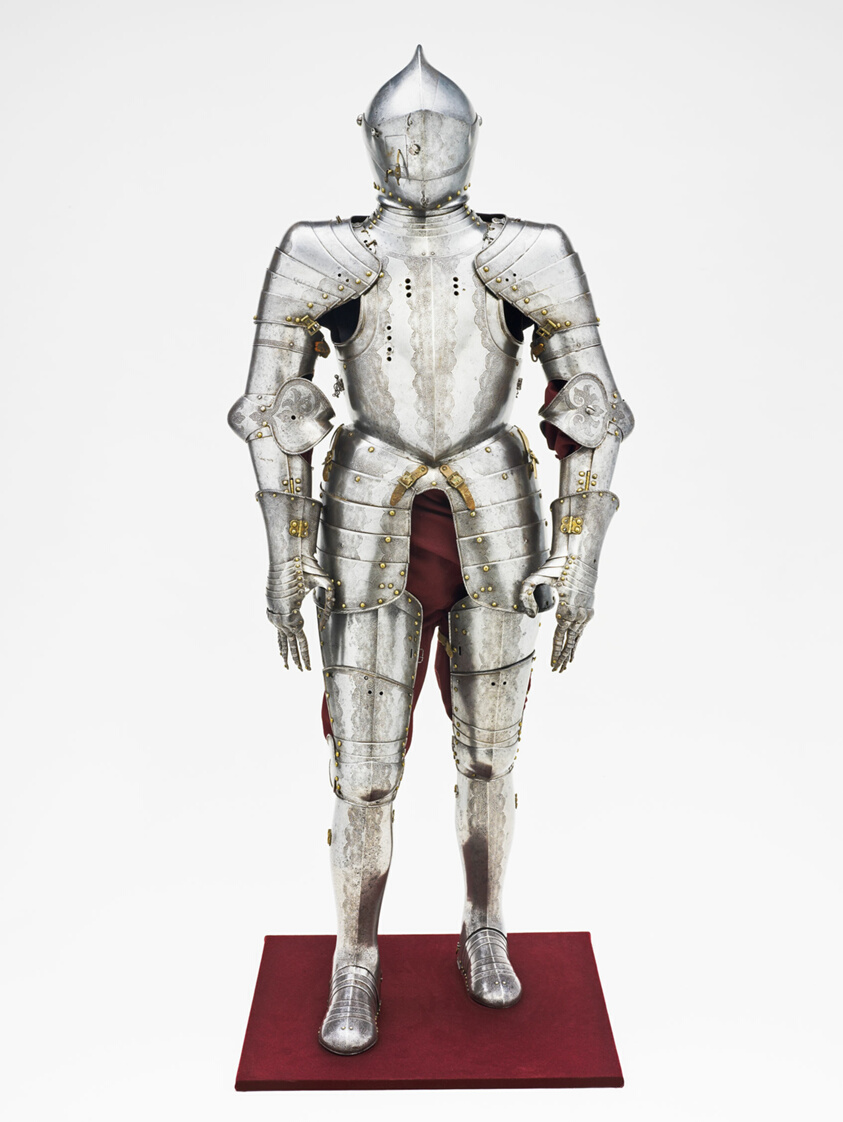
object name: Armor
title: Armor for Field and Tournament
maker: Jörg T. Sorg, the Younger, after; German, Augsburg, active 1502-1542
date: c. 1540/60 with later etching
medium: Steel with gilding, iron, brass, leather, and cord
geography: Augsburg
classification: suit; armor; arms and armor